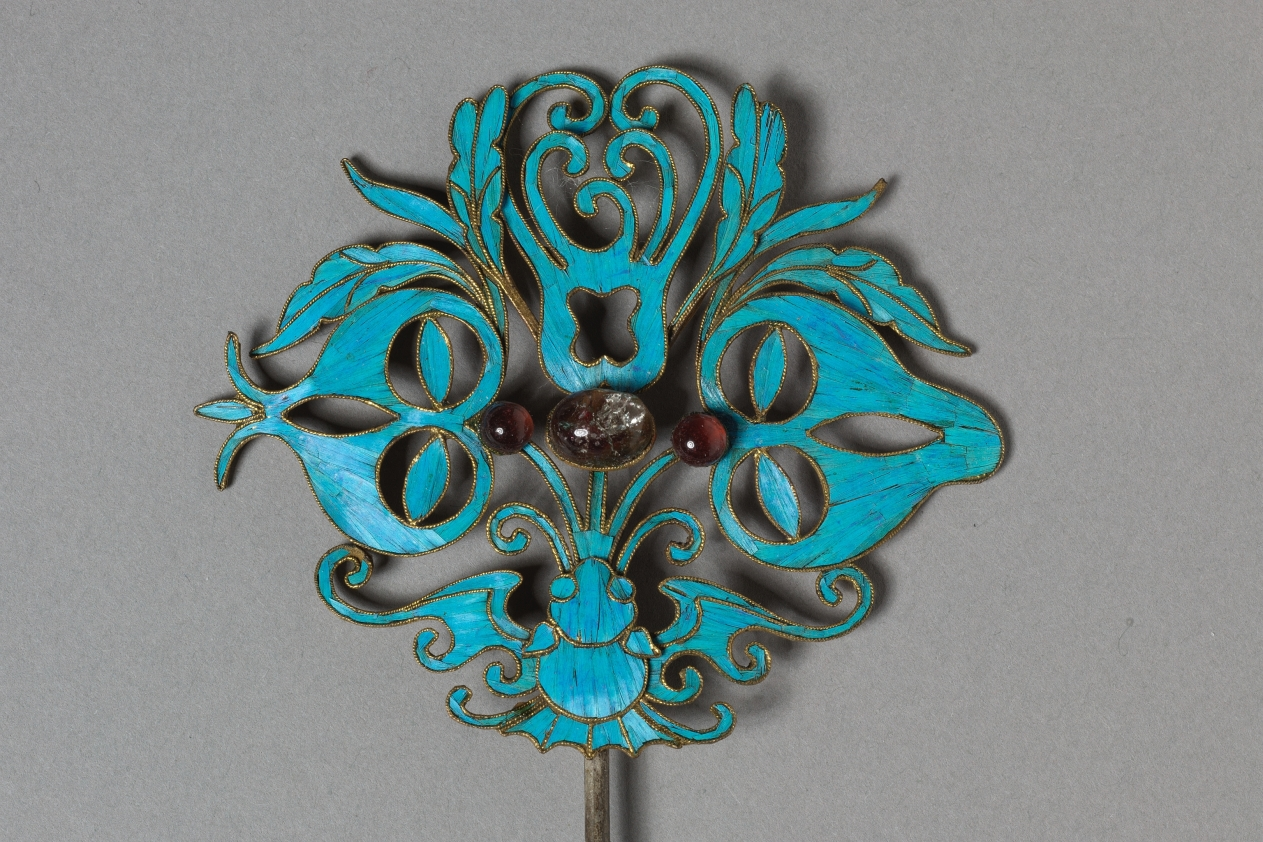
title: Headdress Ornament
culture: China, Qing dynasty (1644-1911)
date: 1800s–1900s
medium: Copper-silver alloy, gilding, kingfisher feathers, glass beads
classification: Jewelry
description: Hair ornaments depicting flowers, butterflies, or birds were worn by ladies of the Manchu elite class.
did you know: The iridescent blue feathers of kingfisher birds are inlaid in hairpins and headdresses.